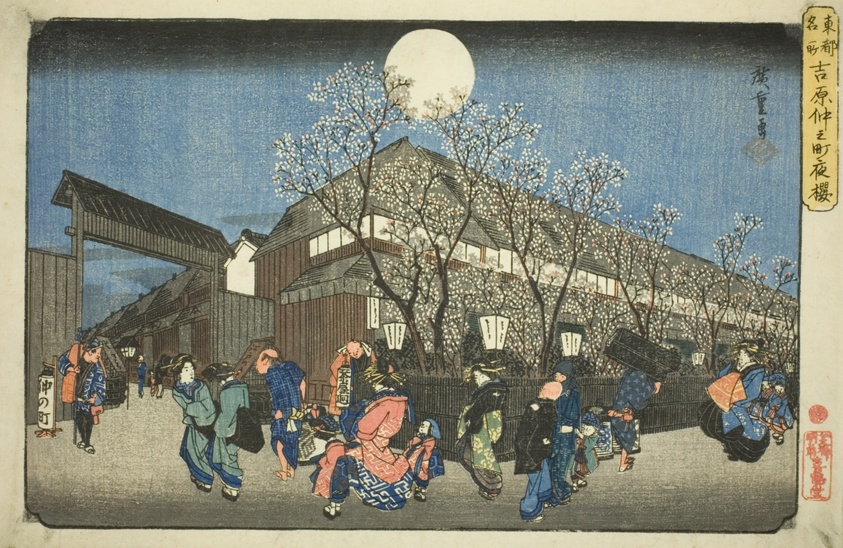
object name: Print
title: Cherry Blossoms at Night on Nakanocho in the Yoshiwara (Yoshiwara Nakanocho yozakura), from the series "Famous Places in the Eastern Capital (Toto meisho)"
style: Japanese (culture or style)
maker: Utagawa Hiroshige 歌川 広重; Japanese, 1797-1858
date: c. 1832/38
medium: Color woodblock print; oban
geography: Japan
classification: woodblock print; print; asian art